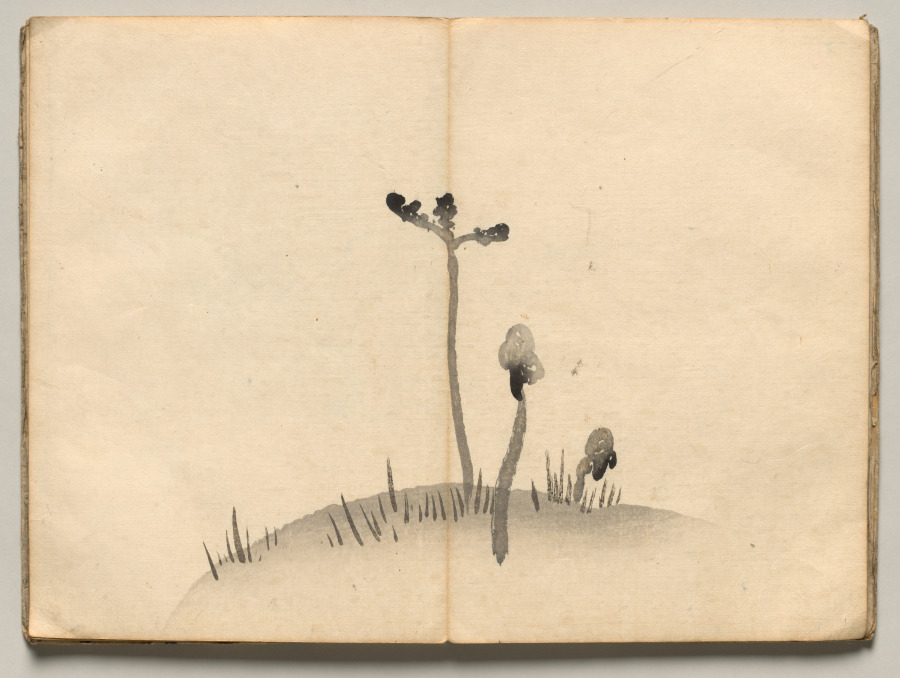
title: Bracken from Ōkyo Picture Book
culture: Japan, Edo period (1615–1868)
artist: after Maruyama Ōkyo (Japanese, 1733–1795)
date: 1850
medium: accordion-style woodblock printed folding-book; ink and color on paper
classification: Bound Volume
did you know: This impression of a book of woodblock-printed designs is missing a spread that depicts a crane.